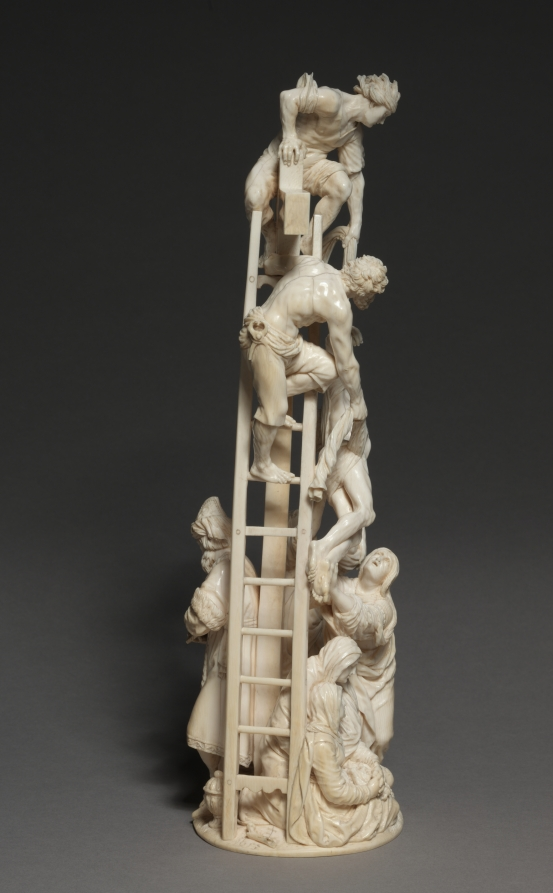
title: Descent from the Cross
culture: Austria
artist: Adam Lenckhardt (German, 1610–1661)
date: 1653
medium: ivory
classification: Sculpture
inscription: inscribed with monogram "AL" conjoined and dated 1653.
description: Carved from a single piece of ivory for Prince Karl Eusebius von Liechtenstein of Vienna, this work is a true tour-de-force. It took Lenckhardt seven years to complete; it is his last known sculpture and the pinnacle of his career. The biblical accounts of the descent from the cross found in the gospels are not consistent, which may contribute to the difficulty in precisely identifying the figures. The Virgin Mary, Saint John, Mary Magdalene, and others were said to be present, but undoubtedly there are other disciples here mourning Christ’s death. The intense emotion registers on the faces of the figures in the scrupulous and exquisitely detailed work.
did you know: Carved from a single elephant tusk, the artist took special care to ensure the ivory did not crack or break as he meticulously crafted each figure in this visually exciting sculpture. Look closely to find tools and small objects included near its base.